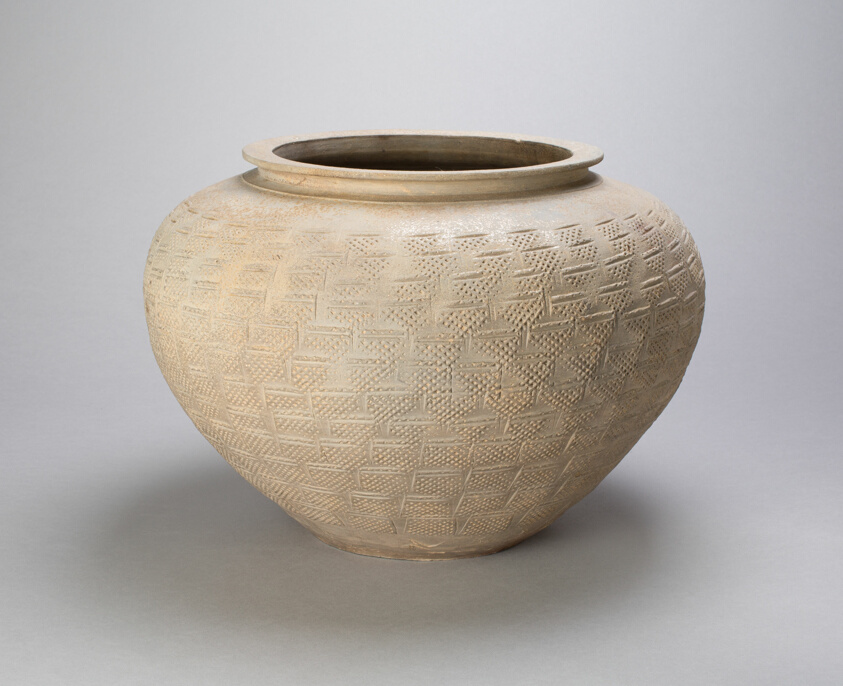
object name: Vessel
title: Jar with Basketweave Pattern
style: Chinese (culture or style)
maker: China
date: Three Kingdoms period (A.D. 220–265), 2nd century A.D.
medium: Stoneware with thin ash glaze and underglaze impressed decoration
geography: China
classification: stoneware; asian art; ceramics; vessel